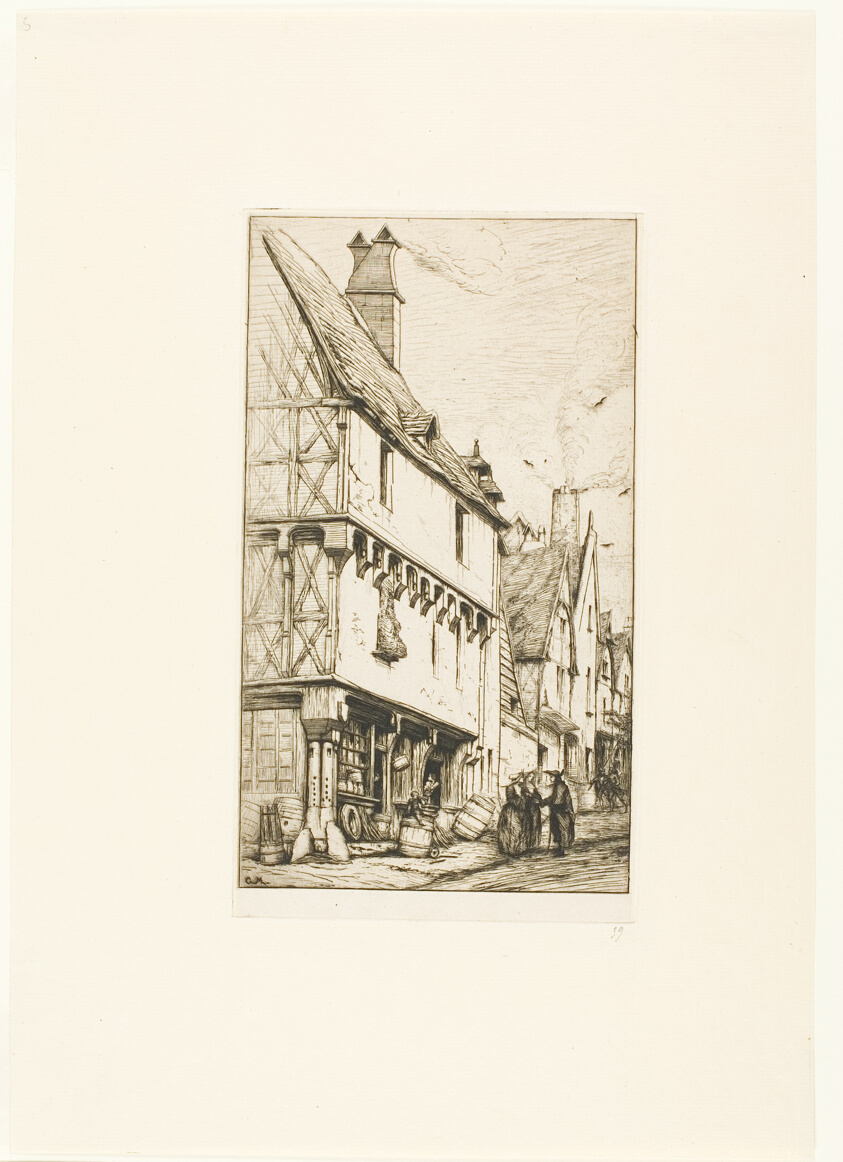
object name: Print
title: An Old House at Bourges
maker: Charles Meryon (French, 1821-1868)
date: 1860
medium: Etching and drypoint on ivory laid paper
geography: France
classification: etching; print; prints and drawing